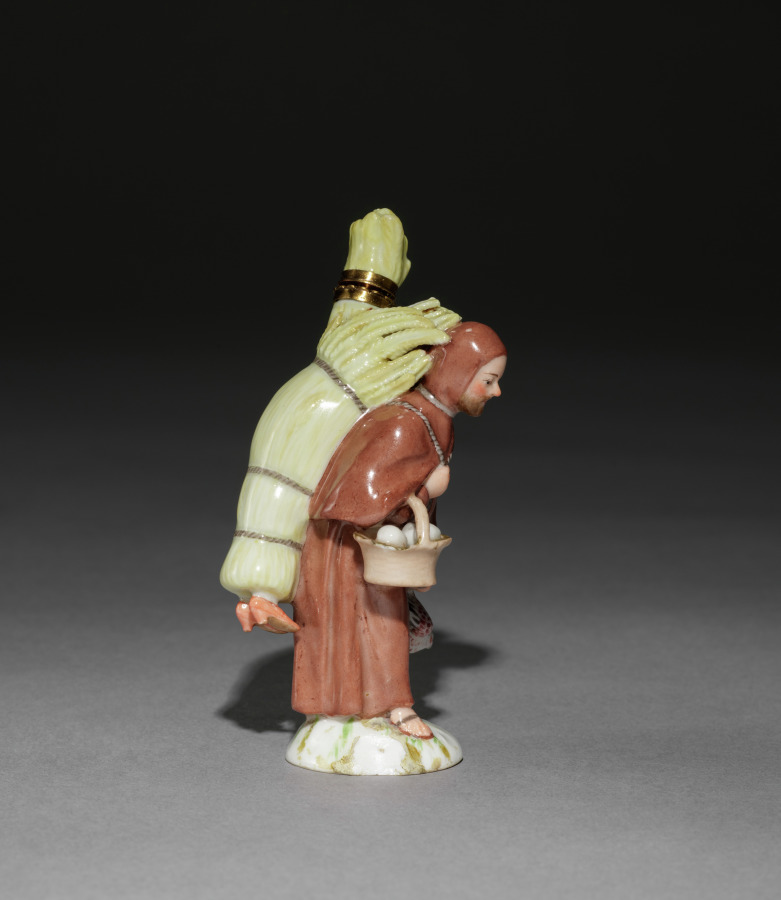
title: Scent Bottle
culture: Germany, Berlin, 18th century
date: 1780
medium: porcelain with gilt metal mounts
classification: Miscellaneous